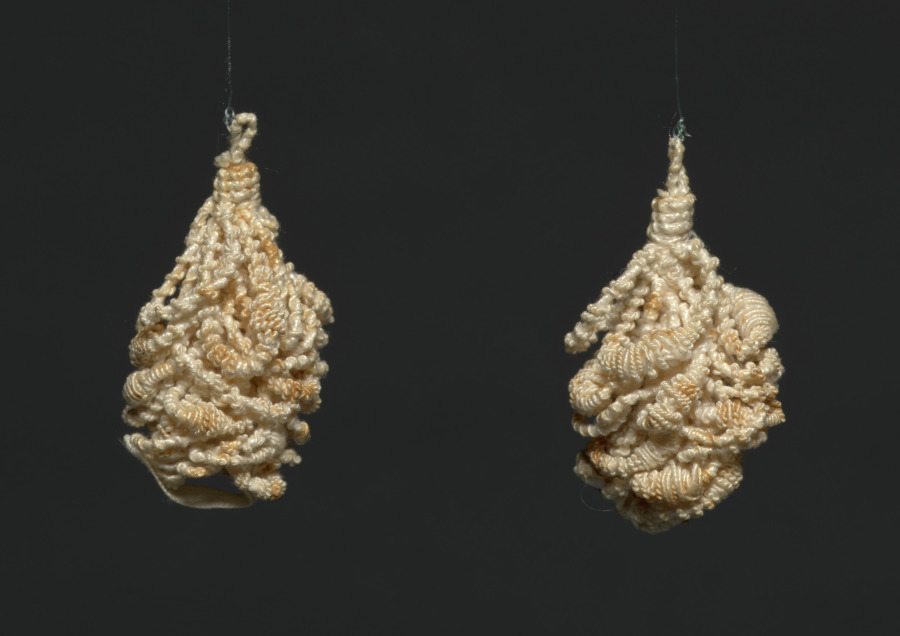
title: Pair of Lace Tassels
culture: Italy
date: 1560–99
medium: lace (wrapping)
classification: Lace